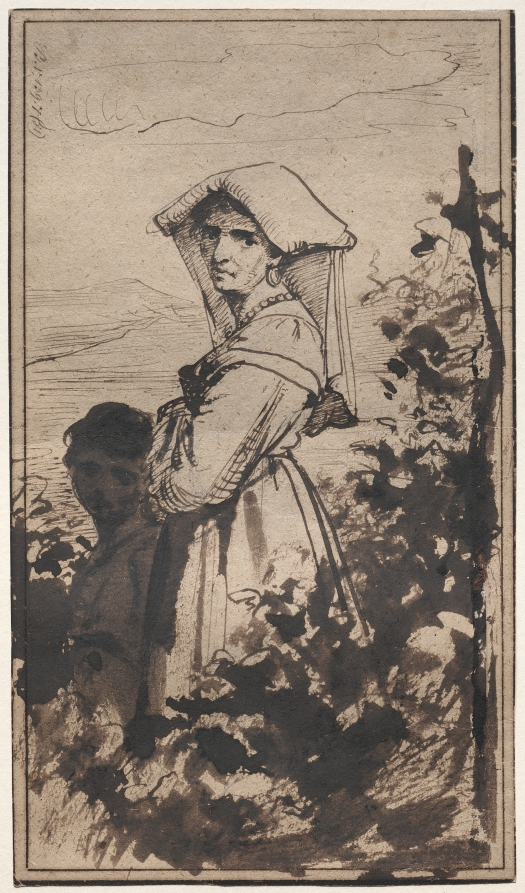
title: Standing Woman and Child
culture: Denmark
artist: Carl Bloch (Danish, 1834–1890)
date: 1850–90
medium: pen and brown ink, brush and brown wash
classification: Drawing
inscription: upper right, in brown ink: "PB. v. 139.7 (81)"; verso, in brown ink: "Carl Bloch. fecit"